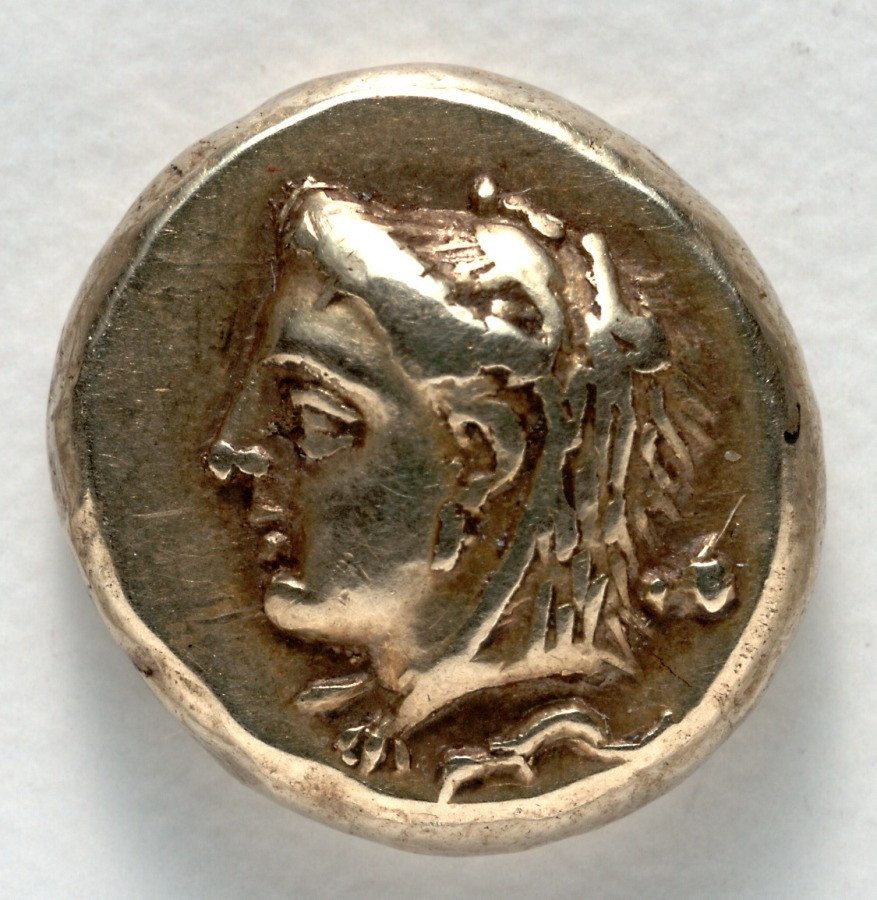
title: Hecte: Head of Omphale (obverse); Incuse Square (reverse)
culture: Greek, minted at Phokaia (Ionia)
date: 387–326 BCE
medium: electrum (gold-silver alloy)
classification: Coins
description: This very small electrum coin shows the Lydian queen Omphale on the obverse. She can be distinguished from Herakles, whose lion-skin she wears, by her earring. Also visible, over her shoulder, is the hero’s club, while beneath her swims a small seal—phôkê in Greek, a punning reference to Phokaia, where the coin was made. The reverse features a much simpler design, a quartered incuse square.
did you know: The Lydian queen Omphale wears the lion skin of Herakles, whom she enslaved.